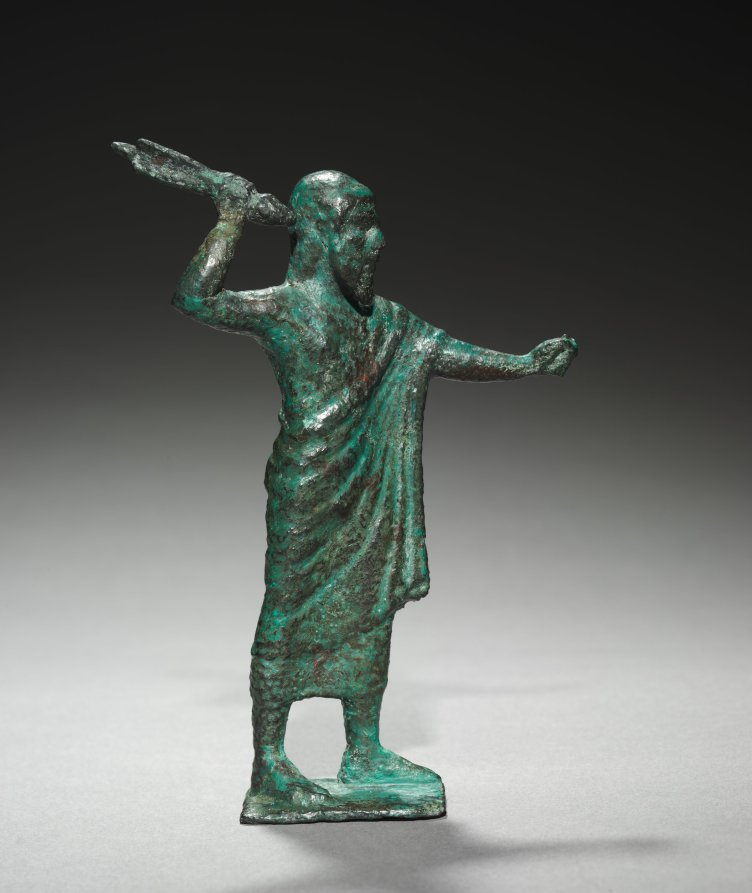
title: Statuette of Tinia (Zeus)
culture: Etruscan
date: c. 500 BCE, perhaps with modern patina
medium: bronze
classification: Sculpture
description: Tinia, the most powerful god in the Etruscan pantheon, often appears with a thunderbolt, the same attribute associated with Zeus and Jupiter in Greek and Roman religion and myth. The outstretched left hand may once have held a scepter. Although the figure finds numerous parallels among other Etruscan bronzes of the late 500s and early 400s BC, its surface is oddly rough and mottled with spots, perhaps the result of early modern treatment or coating meant to protect or improve its appearance. A 2001 analysis of the bronze composition showed results consistent with other ancient Etruscan alloys.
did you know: A break to the right wrist has been repaired with a dowel.